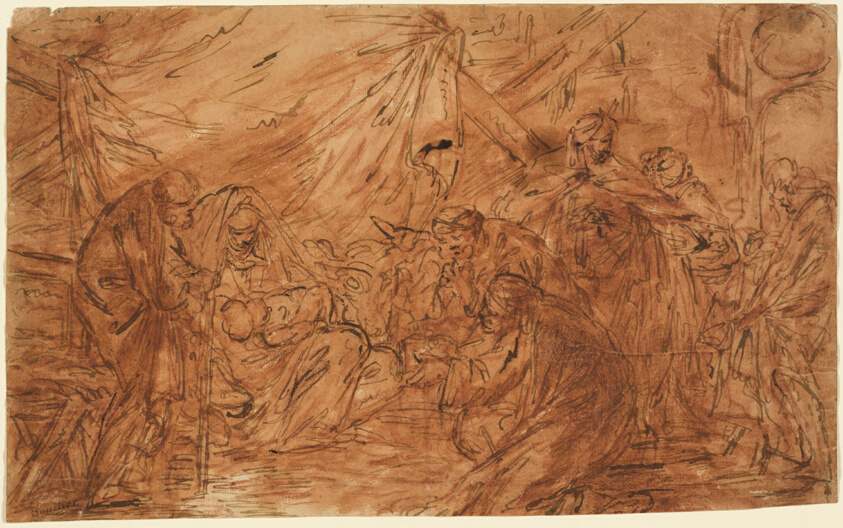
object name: Drawing and Watercolor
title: Adoration of the Magi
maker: Attributed to a pupil of François Boucher (French, 1703-1770); or Nicolas Bernard Lépicié (French, 1735-1784)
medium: Pen and brown ink, over red chalk, with brush and red chalk wash, on ivory laid paper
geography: France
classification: pen and ink drawings; drawings (visual works); prints and drawing